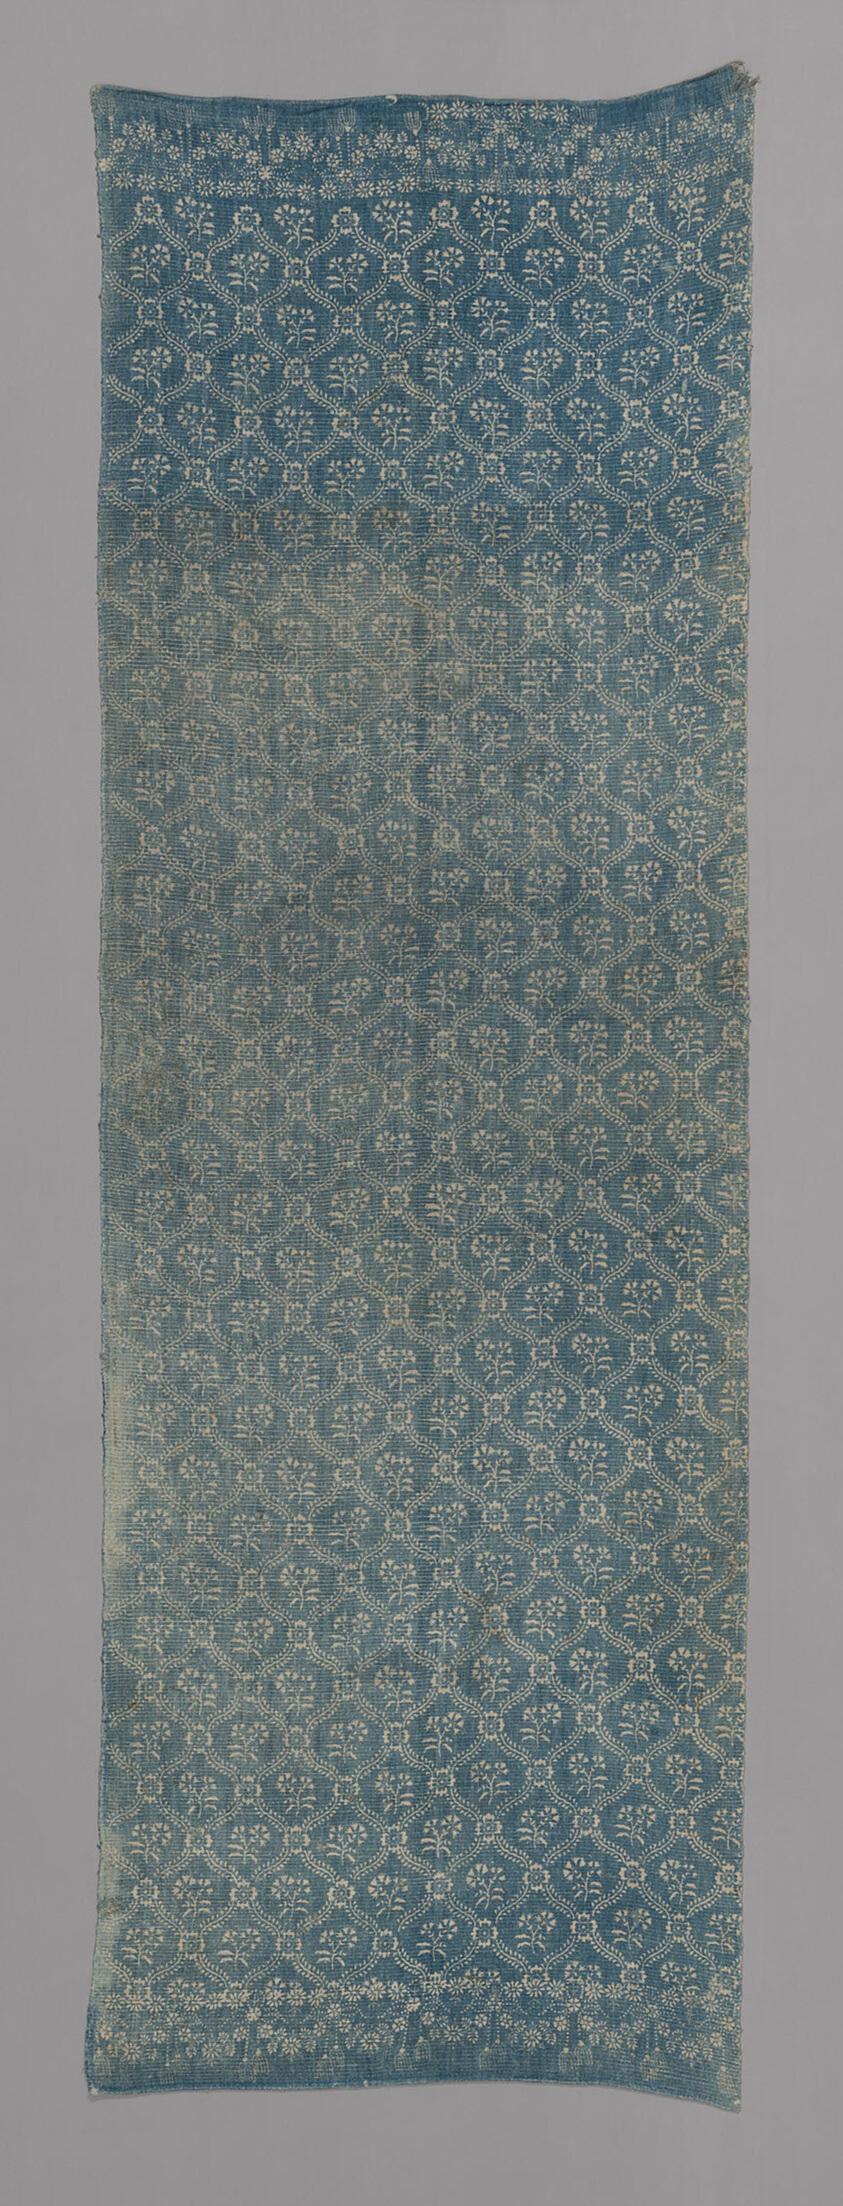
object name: Textile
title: Panel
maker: France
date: 18th century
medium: Cotton, plain weave; resist printed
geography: France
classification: textile; weaving - printed; weaving